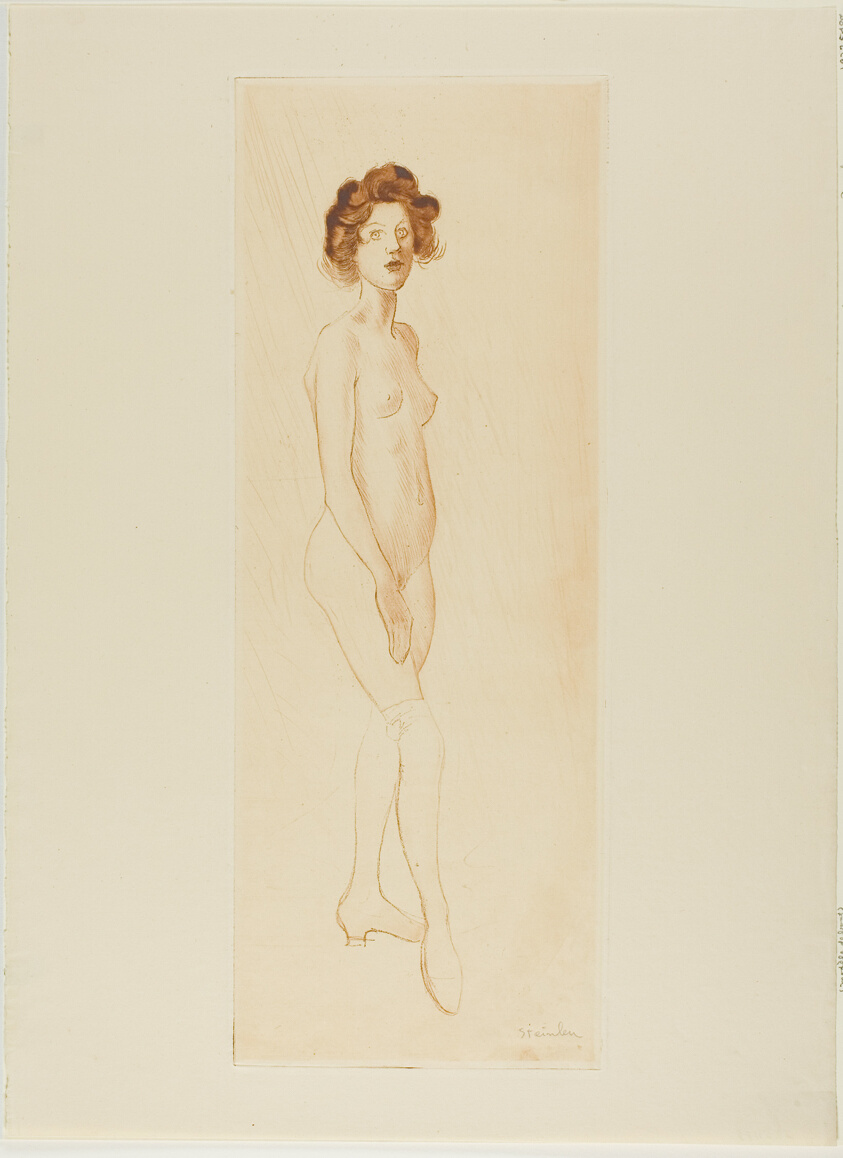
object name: Print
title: Model standing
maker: Théophile-Alexandre Steinlen; French, born Switzerland, 1859-1923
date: June 1902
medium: Soft ground etching, aquatint and drypoint from a zinc plate in bistre (brown) on ivory wove paper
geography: France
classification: etching; print; prints and drawing